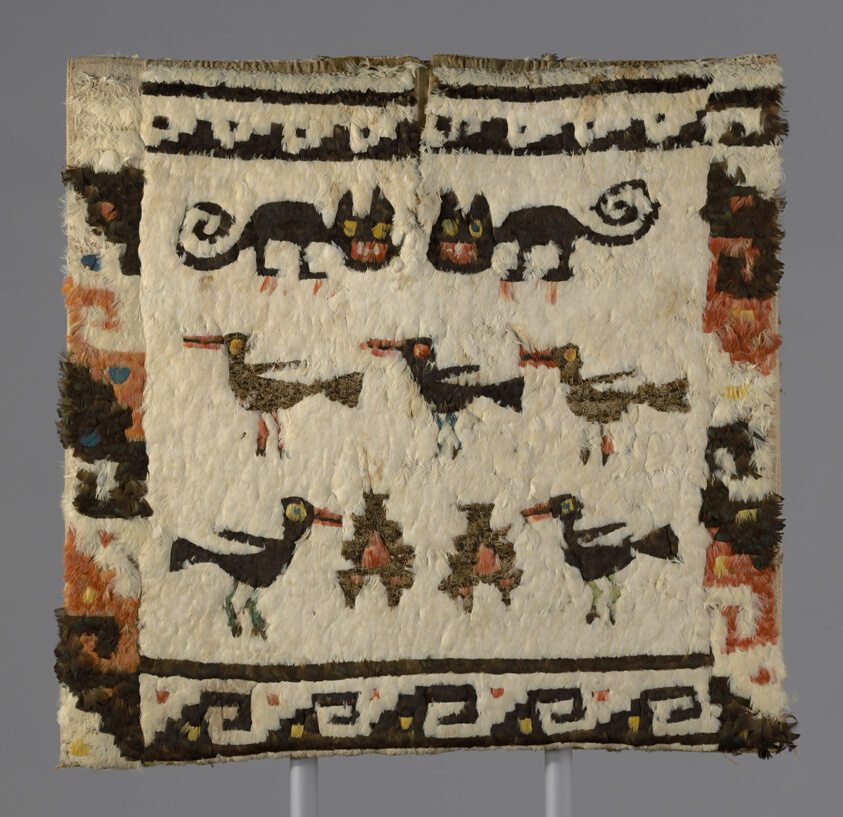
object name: Textile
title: Feathered Tunic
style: chimú, nazca, early intermediate period, Pre-Columbian, americas, andean, andes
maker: Chimú (Peru, south coast, Possibly Nazca Valley,)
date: 1470/1532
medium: Cotton, plain weave; embellished with feathers knotted and attached with cotton in overcast stitches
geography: Peru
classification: tunic; needlework (visual works); textile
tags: animals, fish, birds, cats, feline, stepped motif, triangles